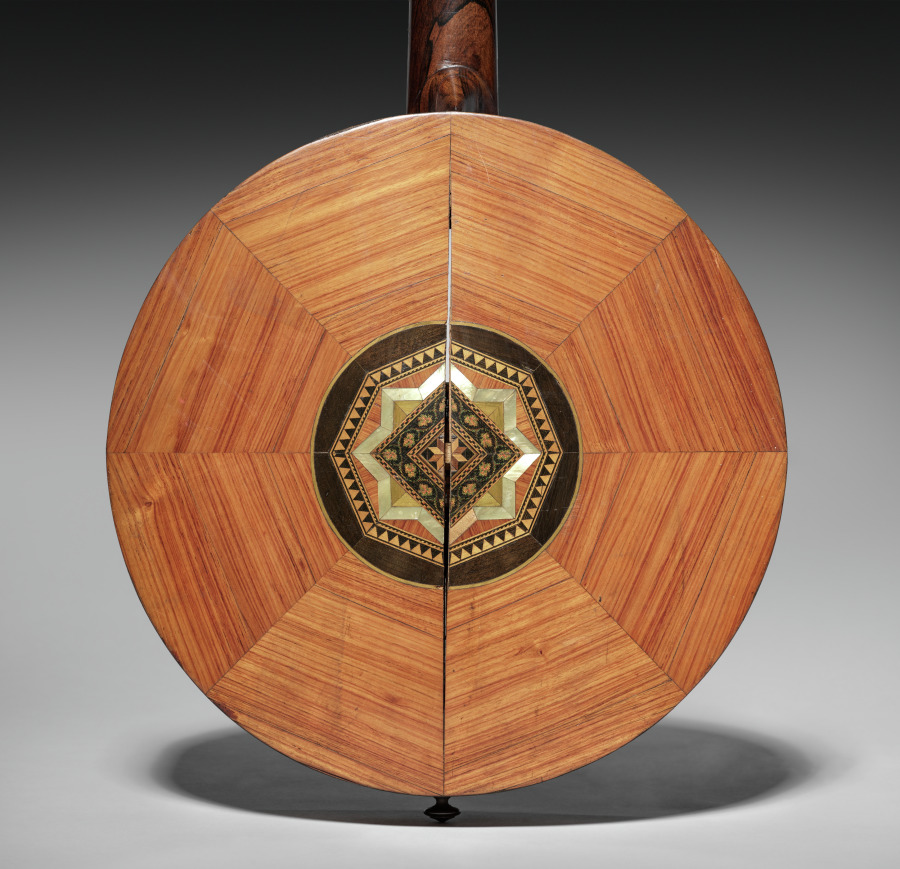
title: Guitar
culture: Italy, 19th century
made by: probably by Fernando Theze (Italian)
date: c. 1860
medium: wood, ebonized wood, mother of pearl inlay, resin, bone?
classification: Musical Instrument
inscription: label inside reads: "Faite a Turin par F. Theze--Amateur."